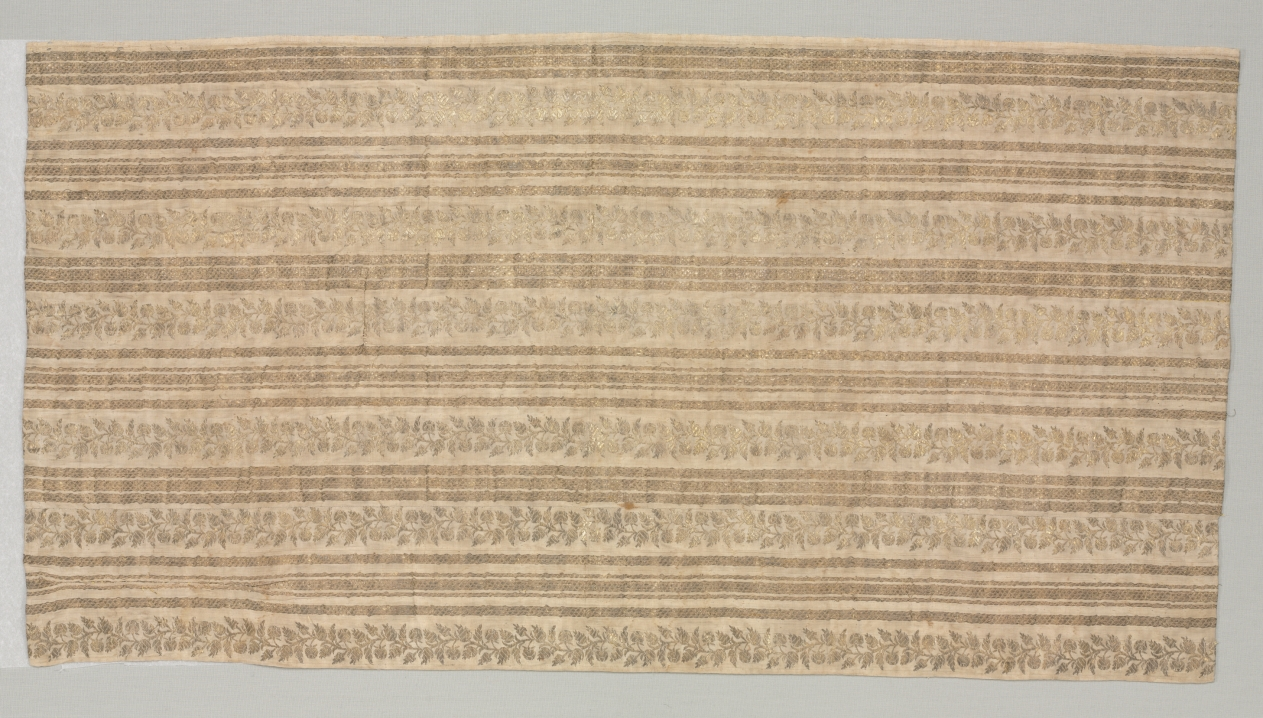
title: Fragment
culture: Iran, 19th century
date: 1800s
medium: brocade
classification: Textile